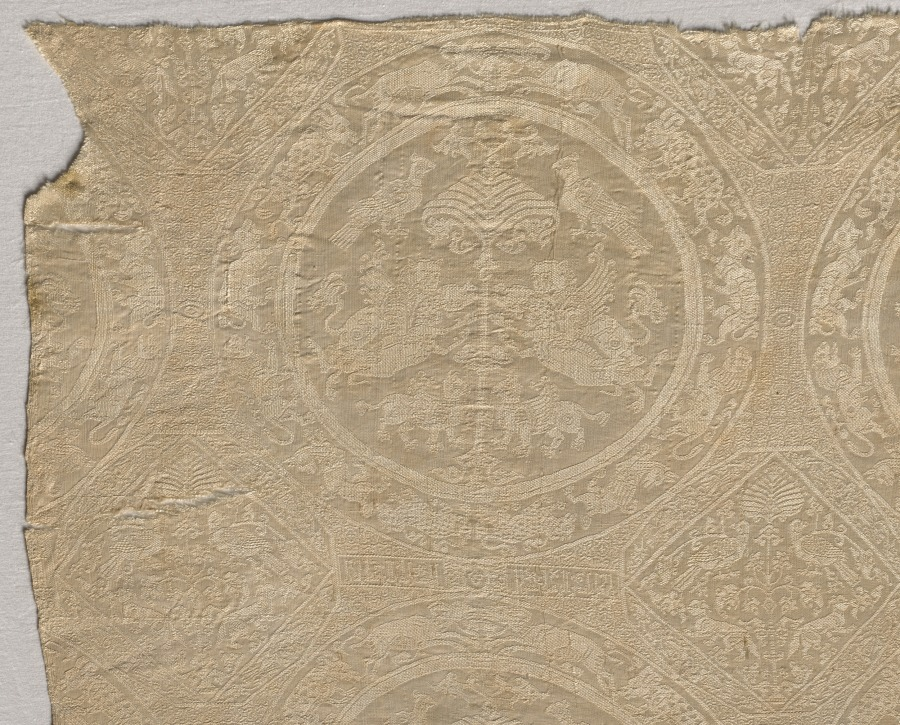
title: Fragment with confronted animal medallions and kufic bands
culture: Iran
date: 1480–1649 (radiocarbon date, 95% probability)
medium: Silk: diasper, tabby weave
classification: Textile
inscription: Wa-kull ma badharahu al-Raman la-mu'awwal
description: The fragment preserves a wide central band flanked by narrower inscription bands. The narrower bands contain, on a dark blue background, a continuous inscription in elaborate Kufic, the ivory-colored lettering oriented at right angles to the warp. On the wider ivory panel there appear ovals enclosing a frieze of running animals within which are hexagons enclosing stars. The ovals alternate vertically with cartouches containing an inscription in simple Kufic, the design appearing in blue, pink, and ivory.